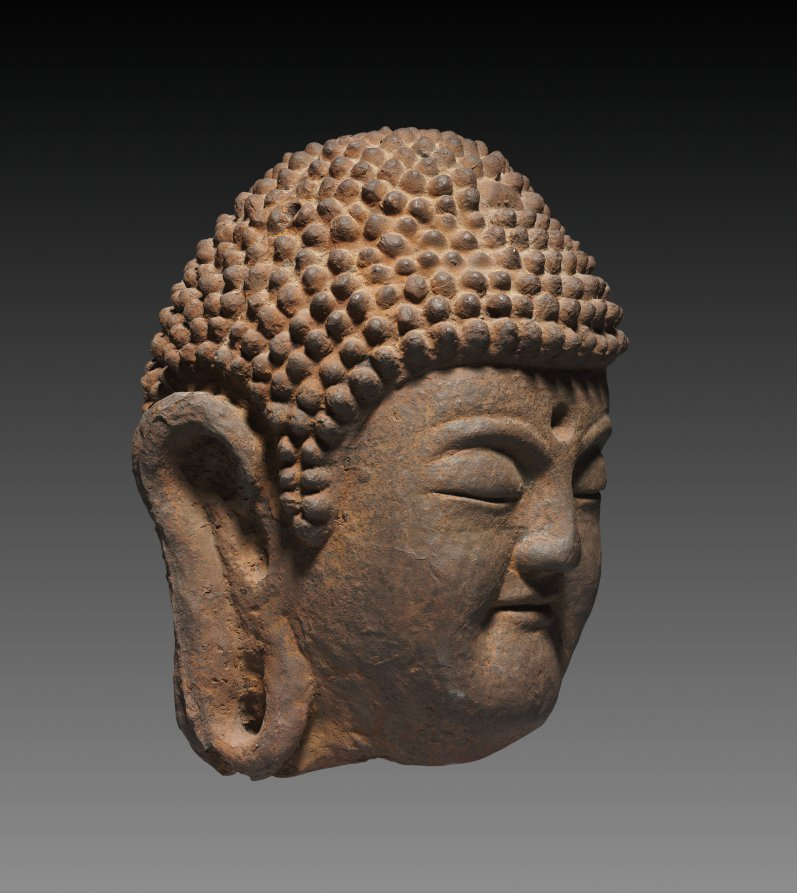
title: Buddha Head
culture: Korea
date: 1900s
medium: cast iron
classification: Sculpture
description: This Buddha has a soft and gentle smile, a typical attribute of Korean images of the Buddha. His plum cheeks and soft smile remind us of his childlike purity while his nearly closed eyes show him in a moment of meditation. The empty divot in the middle of the forehead would originally have contained a jewel symbolizing the light emanating from the Buddha. His head is topped with a profusion of snail-shell curls and an ushnisha, a mound symbolizing the Buddha’s enlightenment.